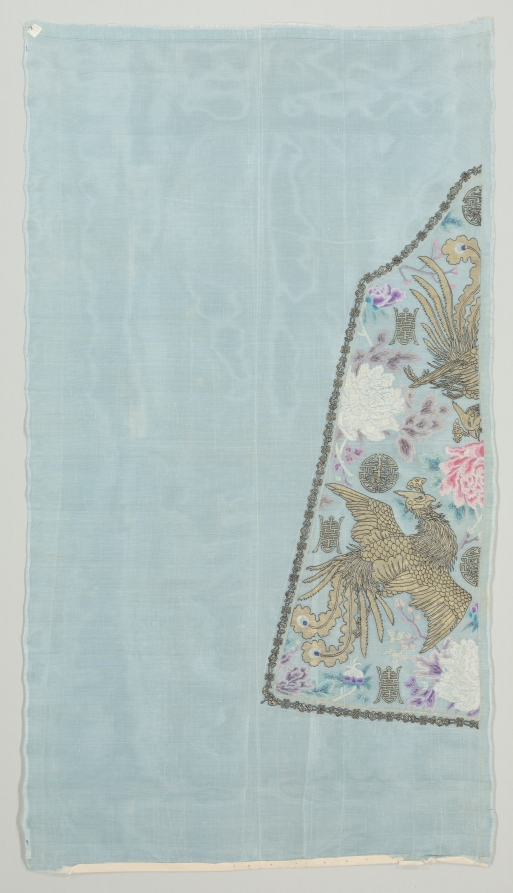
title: Uncut Robe: Sleeve Panel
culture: China, Qing dynasty (1644–1911)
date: c. 1890s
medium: embroidered silk, gauze weave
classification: Garment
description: This is one of three panels of silk netting that would have been cut out and sewn into a gown. This section was for a sleeve. The airy fabric is embroidered in gold, white, blues, pinks, and violets with designs of phoenix birds, chrysanthemums, and symbols of longevity.